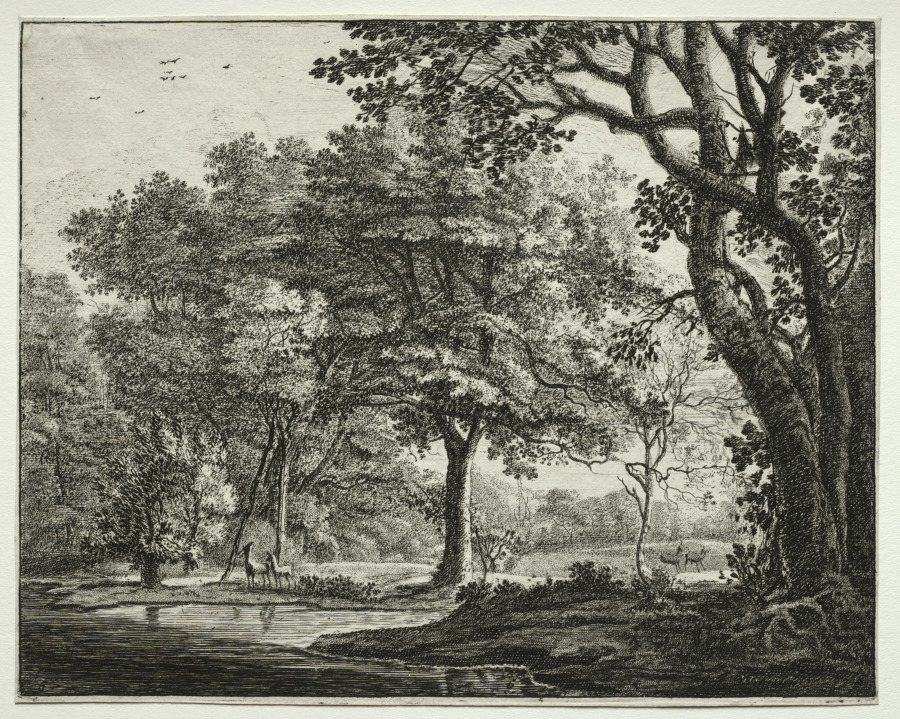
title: Six views in the Wood of the Hague: Plate 6, Two Deer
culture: Netherlands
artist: Roelant Roghman (Dutch, 1627–1692)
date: 1640–52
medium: etching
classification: Print